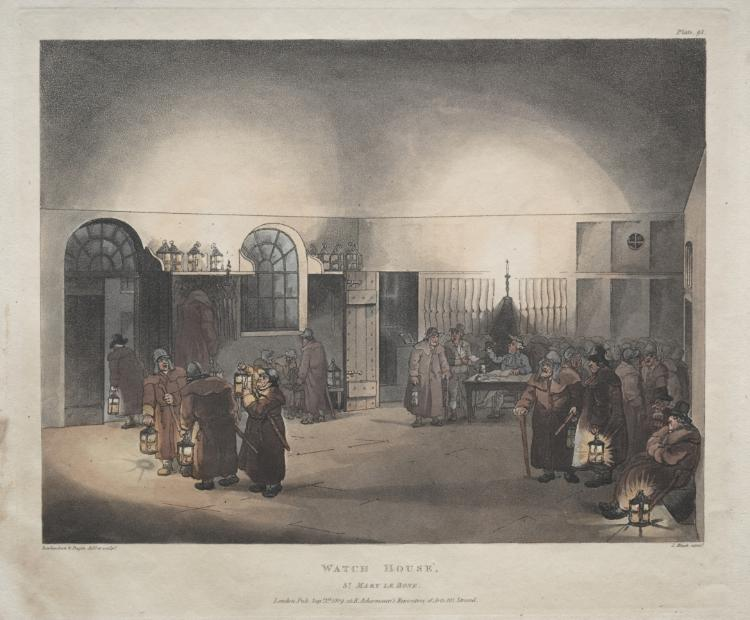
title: Watch House, St. Mary Le Boue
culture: England, 19th century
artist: Thomas Rowlandson (British, 1756–1827)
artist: and Augustus Charles Pugin (British, 1762–1832)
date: 1809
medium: etching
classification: Print